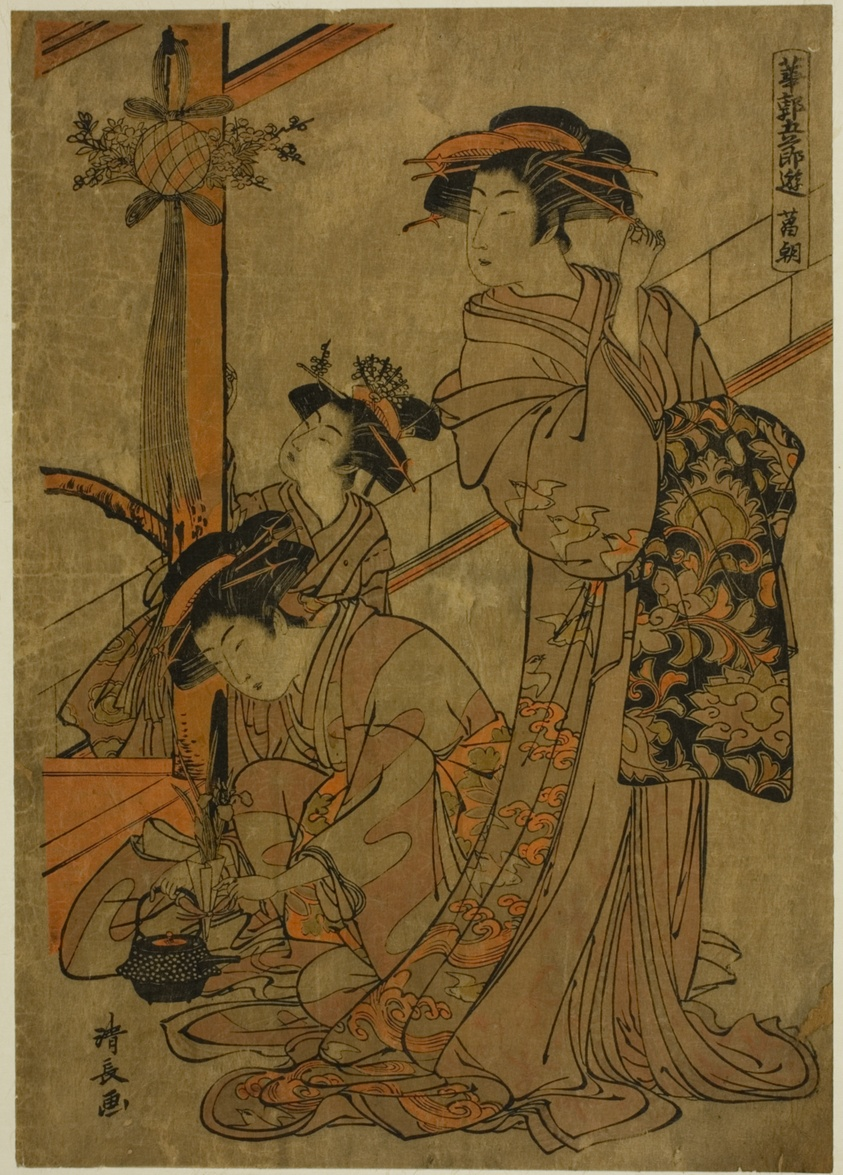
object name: Print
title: Morning of Iris, from the series "Five Festivals in the Pleasure Quarters (Hanakuruwa gosechi no asobi)"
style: Japanese (culture or style)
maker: Torii Kiyonaga (Japanese, 1752-1815)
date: c. 1779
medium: Color woodblock print; aiban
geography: Japan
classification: woodblock print; print; asian art